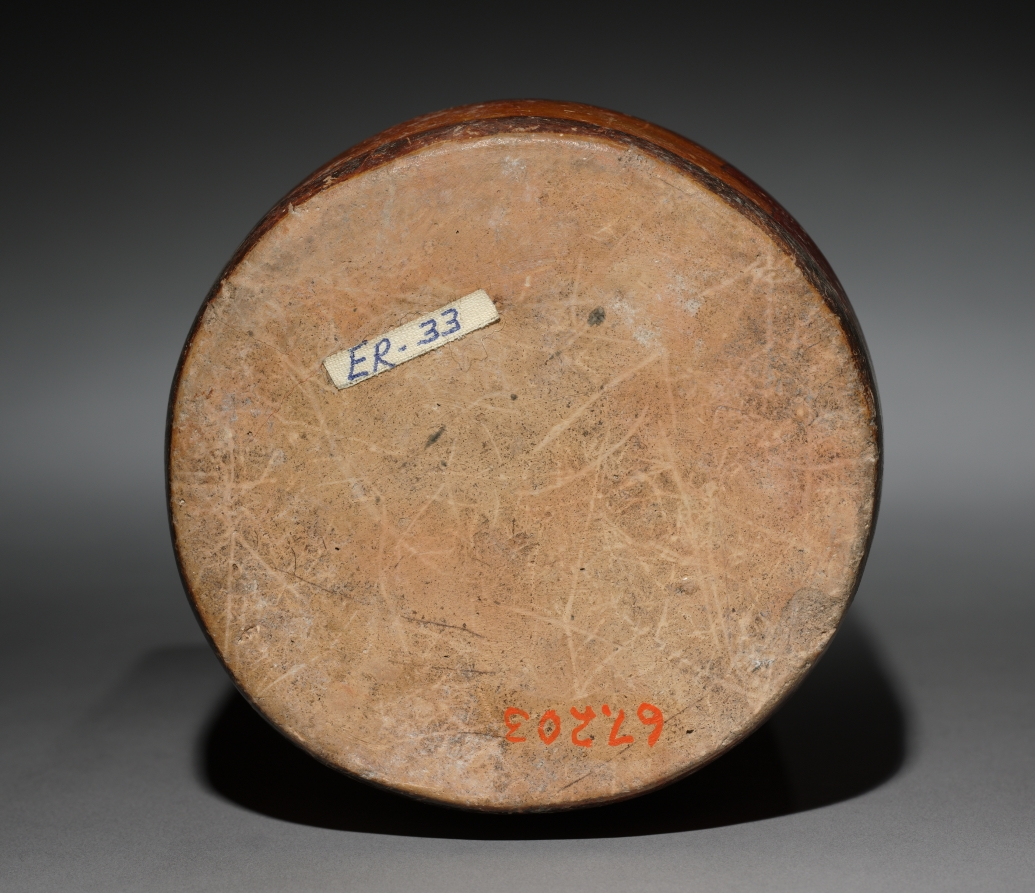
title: Cylindrical Vessel with Palace Scene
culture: Mexico or Central America, Maya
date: 600–900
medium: earthenware with colored slips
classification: Ceramic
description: The scene here may commemorate a special event in the life of a Maya ruler, who stands on a stairway before his throne, his legs framed by a litter on the ground. His gesture and the jaguar pelt at the waist visually unify him with his attendants. The ruler perhaps used the vessel as a drinking cup on important occasions; fine ceramics also served as gifts and as offerings in tombs.